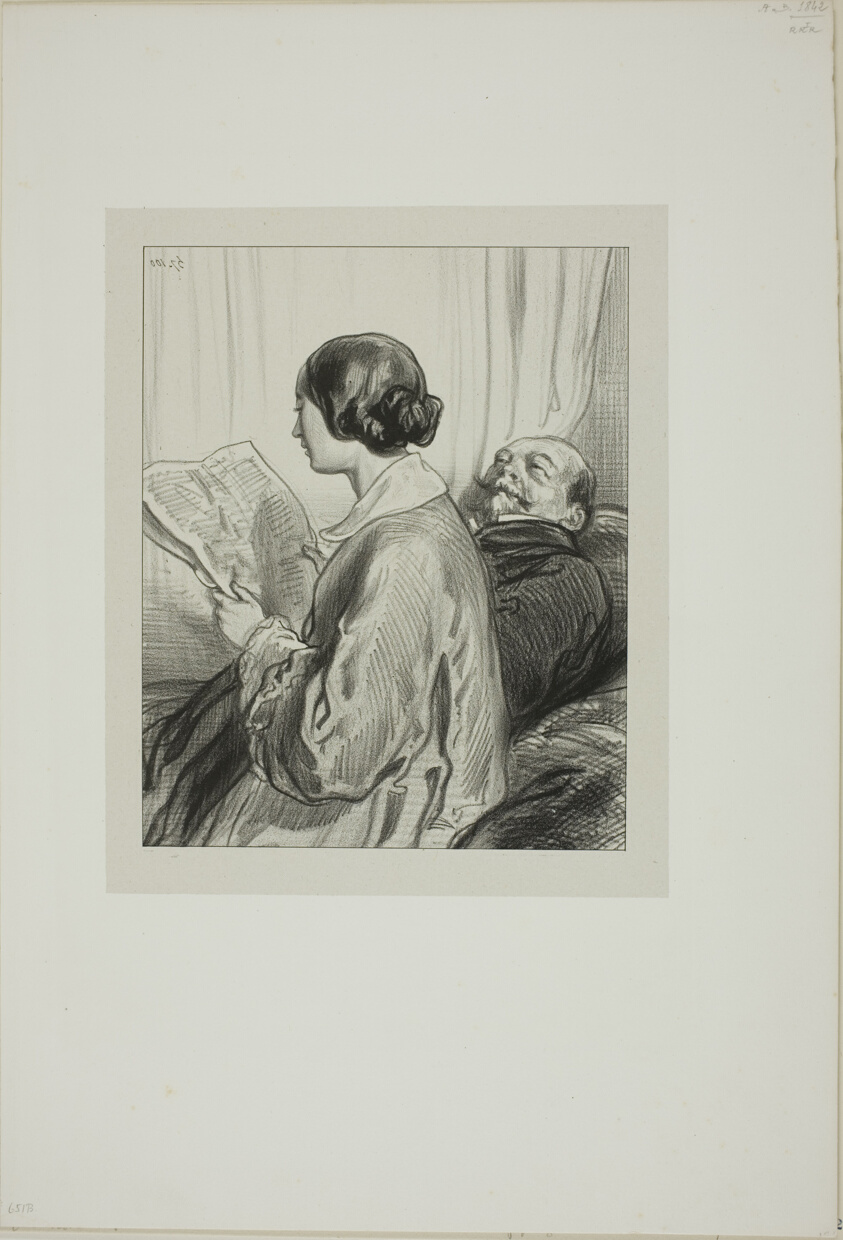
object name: Print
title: Masks and faces: We have never permitted...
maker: Paul Gavarni (French, 1804-1866)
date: 1857–58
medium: Lithograph in black on light gray China paper, laid down on ivory wove paper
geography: France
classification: lithograph; print; prints and drawing